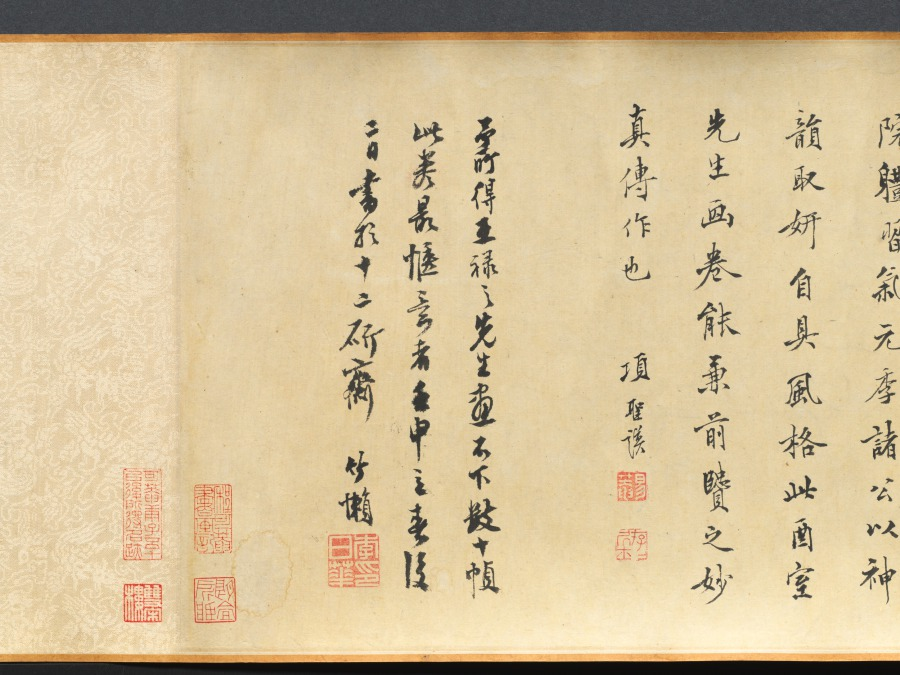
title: Flowers of Four Seasons, with Poems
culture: China, Ming dynasty (1368–1644)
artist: Wang Guxiang (Chinese, 1501–1568)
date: 1531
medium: handscroll; ink and light color on silk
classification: Painting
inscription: Artist's inscription, signature, and 15 seals. Ink Orchids. Sewn as pendants for the man of worth, swaying quiety, fragrance in the valley. [seal] Hsiao-chu ts'un Peony. Wiping his face, the young gentleman Ho [Ho Yen of Wei, Three Kingdoms] appears to have been powdered. His previous life was the perfume-stealing Han Shou [of Chin, 265–419 CE], the fragrance still lingers. [seal] Ts'un-wu chai. Flowering Crab Apple, New Bamboo. Shao-lin [Du Fu, 712–770] had to put down his brush. [Flowering Crab Apple]. Yü-k'o [Wen T'ung, d. 1079) in vain wrote poems about [Bamboo]. [seal] Yu-shih. Lotus Flowers. When she turns her head, half-hidden by a fan, and casts a glance, all the beautiful women become colorless. [seal] K'ang yüeh huai. Loquat. Ripeness in summer. [seal] Lu-chih. Pomegranate Flower. Whenever I remember you I will send my thoughts, but where have you gone--the [skirt] of pomegranate red? [seal] Wu-ho Sheng. Day Lily. Plant the day lily to forget sorrow. [seal] Yu-shih. Chrysanthemum. The untrammelled joy at the eastern fence. [seal] Lu-chih. Begonia. Comparing it to the beauties of Spring, and spreading them out as trimming for the stone steps. [seal] Yu-shih. Hibiscus. In recent years I have always enjoyed looking at flowers; instead of dark red I preferred pink ones. [seal] Jen-sheng i-lou. Narcissus, Camellia. The jade girdle left behind at Lo River. [Narcissus]. The precious pearls glitter before Spring. [Camellia]. [seal] Lu-chih. Heavenly Bamboo (Nandina domestica). A single branch in the wintry season. [seal] K'ang yüeh huai. Plum. Fragrant snow in the Lo-fou Mountains. [seal] Ts'un-wu chai. In the eleventh lunar month of the hsin-mao year of the Jiaqing era [1531], [I] imitated the boneless style of Yüan masters in sketching from life. Guxiang [seals] Yu-shih; Lu-chih. Translated by Wai-kam Ho/Lingyun Shih Liu (1980)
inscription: 2 colophons and 23 additional seals: 1 colophon dated 1632, and 2 seals of Li Jih-hua [Li Rihua] 李日華 (1565–1635); 1 colophon and 2 seals of Xiang Shengmo 項聖謨 (1597–1658); 3 seals of Liang Qingbiao 梁清標 (1620–1691); 6 seals of the Jiaqing 嘉慶 emperor (r. 1796–1820); 9 seals of Ch'eng Ch'i [Cheng Qi] 程琦 (1911–1988)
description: In this painting, flowers are loosely arranged by the seasons: narcissus and peony represent early spring; yellow loquat and lotus, summer; chrysanthemum, autumn; and the plum and evergreen bamboo, winter. The artist added to each flower a poetic line of calligraphy associating each plant with a historic or legendary figure. For example, the chrysanthemum, along with the line “The untrammeled joy at the eastern fence,” refers to the poet Tao Yuanming (died AD 427) who enjoyed chrysanthemums at the eastern fence in his garden. The scroll illustrates Wang Guxiang’s mastery of free brushwork, combining light monochrome ink with transparent colors. In his inscription, Wang says he used the “boneless” style without outlines as developed during the Yuan dynasty (1279–1368). Wang was a native of Changzhou, a city in southeast China known for its rich flora and fauna, and flower-and-bird painting tradition.